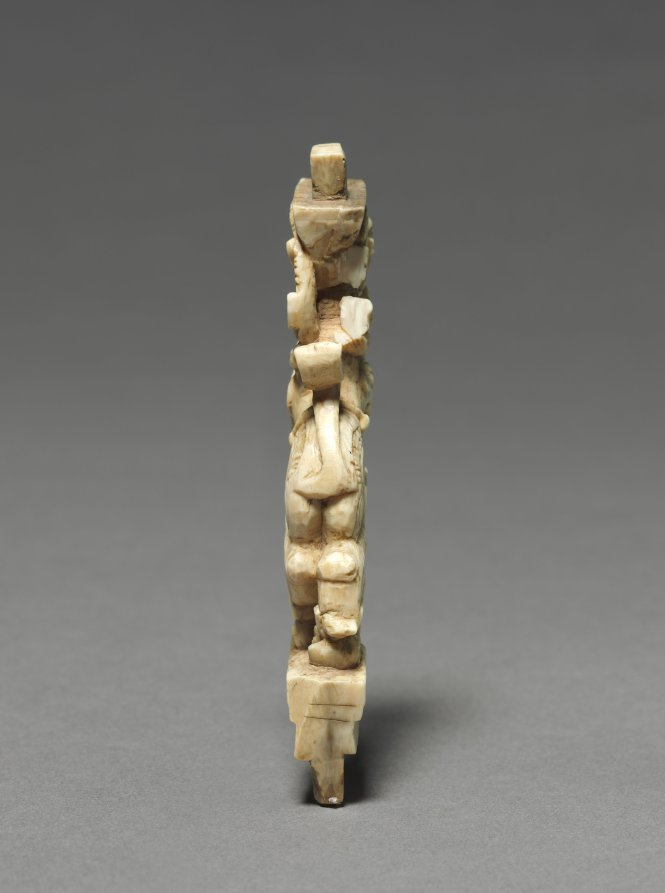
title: Carved Bracket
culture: South India, probably Madurai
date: 1600s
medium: Ivory with traces of pigment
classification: Ivory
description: Composite creatures with the body of a lion, tusks and trunk of an elephant, and horns of an antelope are standard elements of medieval Indian architecture and furniture. Traces of pigment indicate that this work was once brightly colored.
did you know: Ivory was most often harvested from a recently deceased elephant.